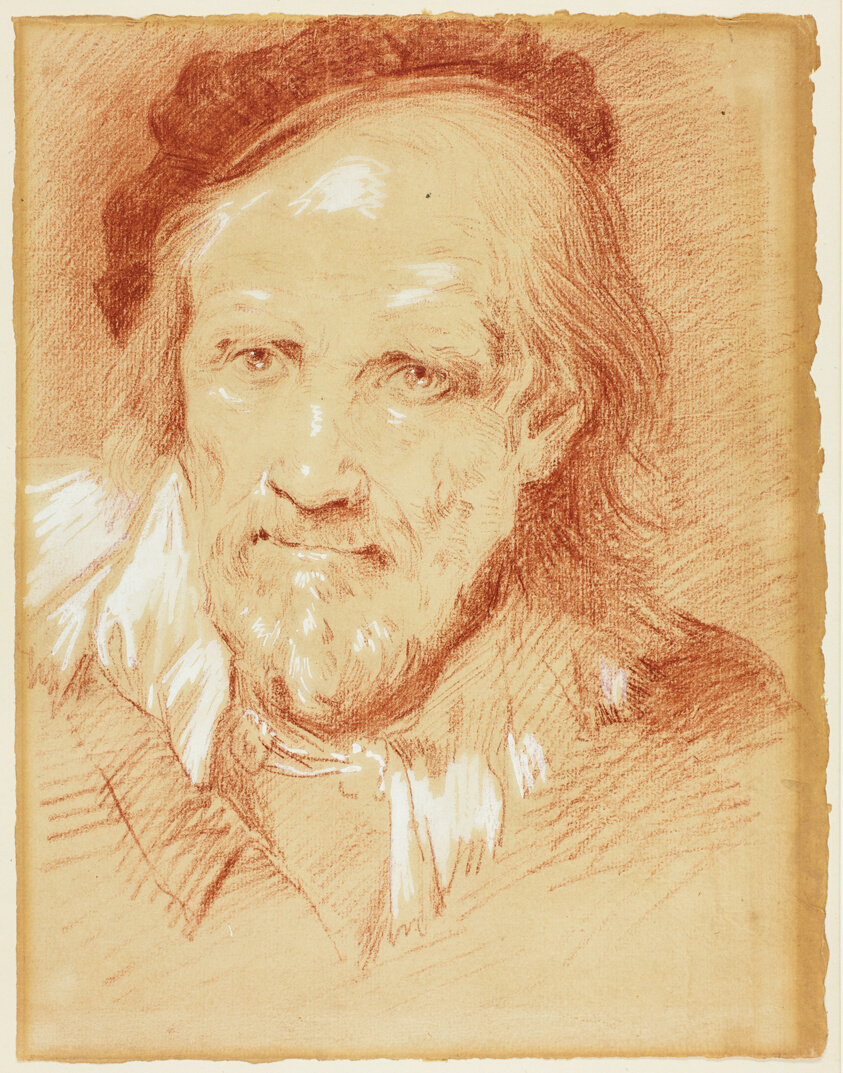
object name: Drawing and Watercolor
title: Study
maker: Possibly Giuseppe Nogari; Italian, 1669-1763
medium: Red chalk, heightened with white gouache, over traces of graphite on tan laid paper, laid down on cream laid paper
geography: Italy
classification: chalk; drawings (visual works); prints and drawing